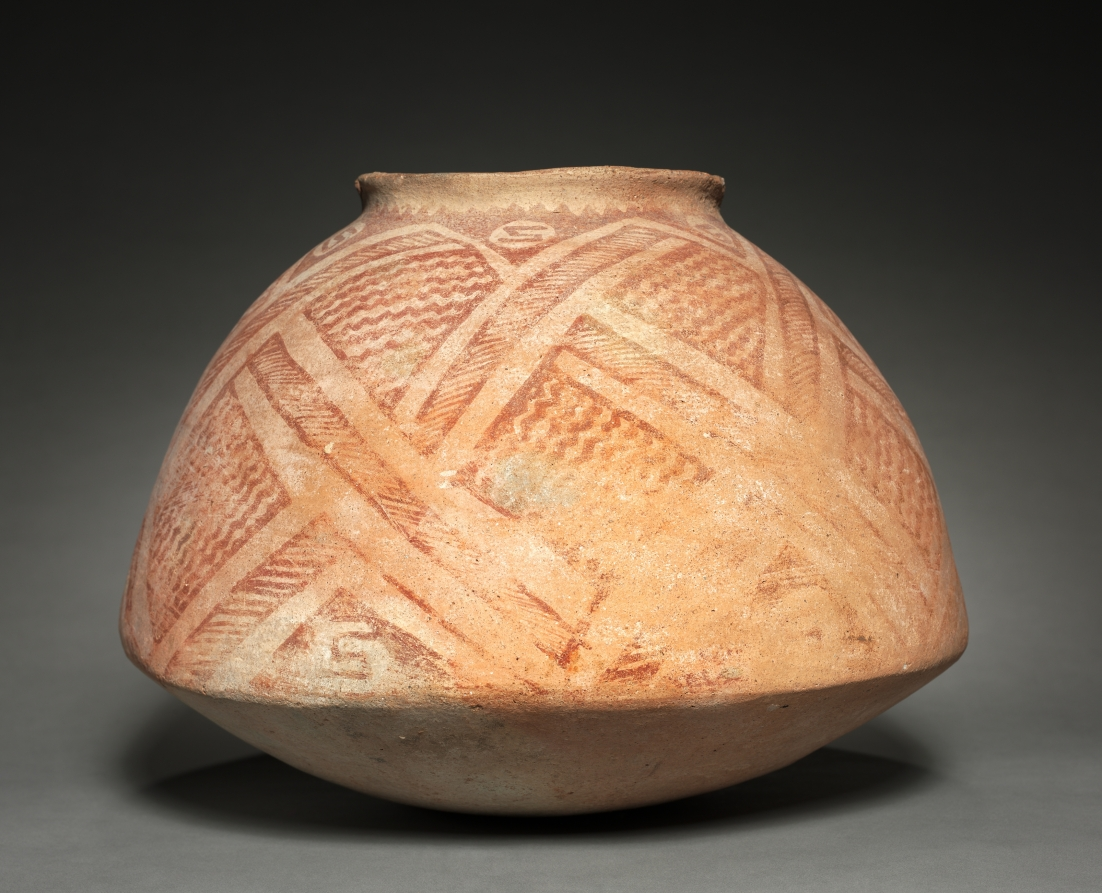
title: Large Storage Jar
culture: Southwest, Arizona, Hohokam, 10th-11th century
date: c. 900–1100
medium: Ceramic, slip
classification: Ceramic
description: The Hohokam Arizona were accomplished agriculturalists whose decline after 1350 was caused partially by drought, and then flooding that overcame irrigation canals. Many Hohokam settlements boasted large public structures including platform mounds and oval ballcourts. The latter reveal contact with Mexico, where the ballgame was a long-established tradition.